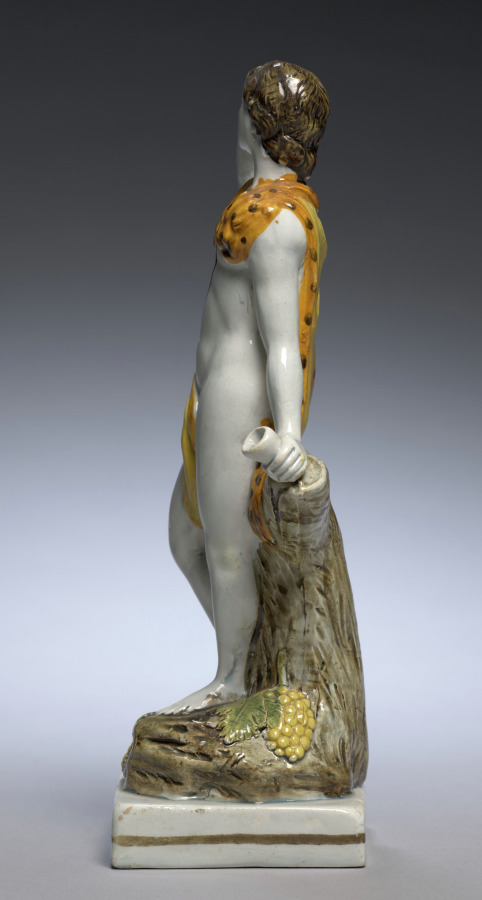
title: Bacchus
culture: England, Staffordshire, Pratt ware, late 18th-early 19th Century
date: c. 1800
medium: earthenware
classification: Ceramic